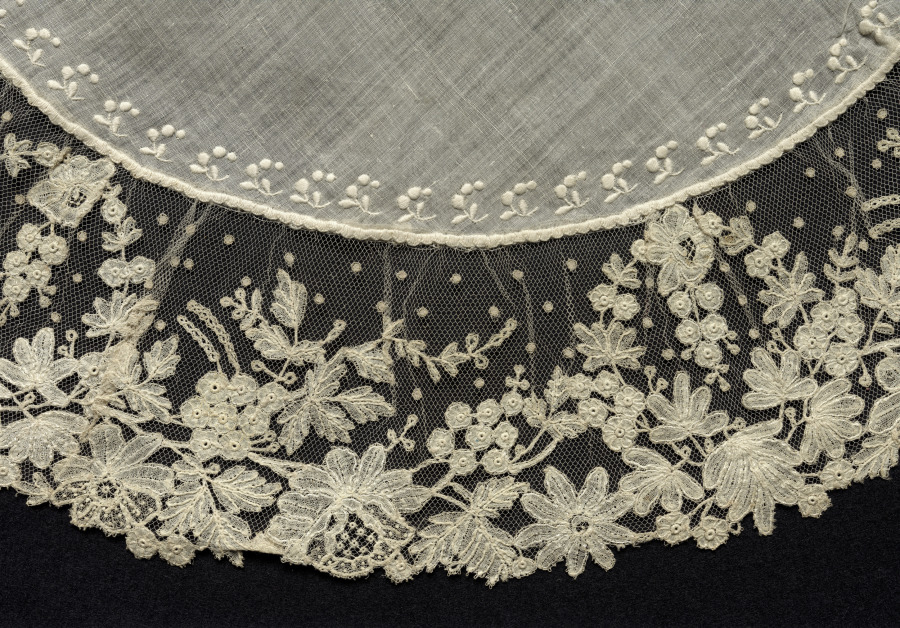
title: Lace Handkerchief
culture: Flanders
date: 1800–1840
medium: Plain weave linen center with embroidery; edging of Flemish bobbin lace applied to machine-made net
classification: Lace